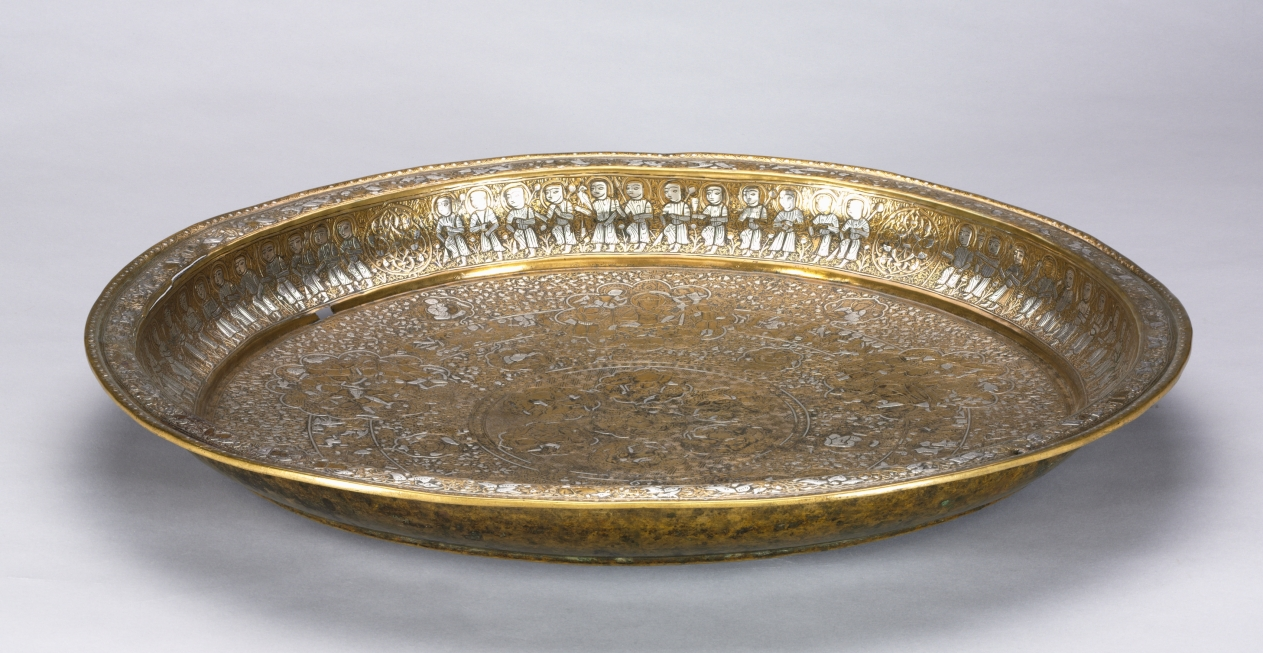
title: Tray Portraying Courtly Pleasures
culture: Syria, Ayyubid period (1171–1260)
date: 1240s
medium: sheet brass inlaid with silver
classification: Metalwork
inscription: The presence of ligatures in the narrow circular bands with interconnected human and animal figures suggests this may be a degenerate form of animated script. It is indecipherable.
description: This tray features images of courtly life interspersed with astronomical symbols. The scenes contained within large multilobed medallions display an enthroned prince with lions at his feet, a banquet, a hunt, dancers, and musicians. Contained within the concentric circles there are also references to solar and lunar motifs, including figures holding sunbursts and lunar crescents. This tray is made of a single sheet of brass and the silver inlay, which is best preserved on the tray’s inner curve, suggests its original brilliance.